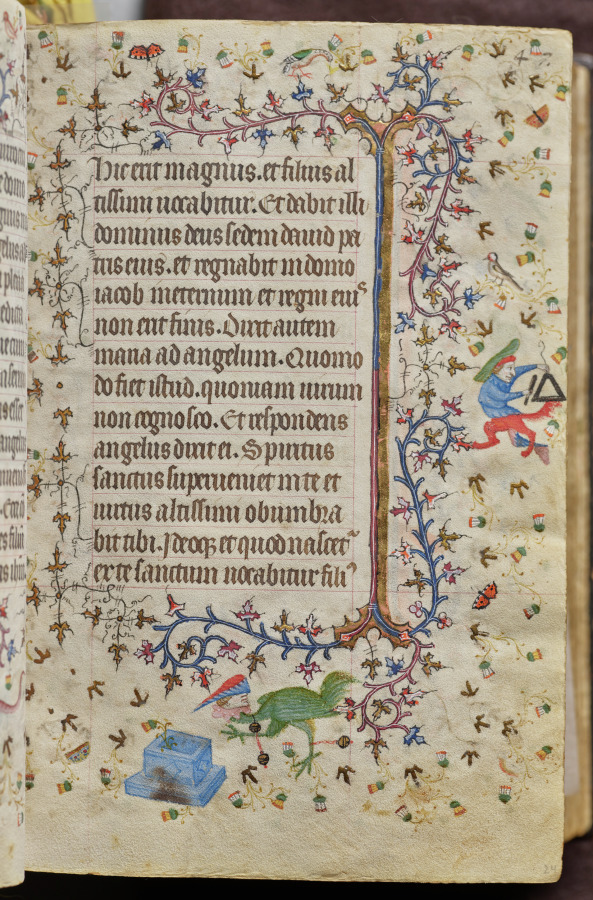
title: Hours of Charles the Noble, King of Navarre (1361-1425): fol. 24r, Text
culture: France, Paris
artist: Master of the Brussels Initials and Associates (French)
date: c. 1405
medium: ink, tempera, and gold on vellum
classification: Bound Volume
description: This precious volume was obviously highly prized by its owner, the French-born King of Navarre, who had his coat of arms painted on no less than twenty folios. Rather than directly commissioning this manuscript from a specific workshop, it seems that Charles the Noble acquired his book of hours -- perhaps ready-made for the luxury market -- while on a trip to Paris in 1404-05. A collaborative effort, six painting styles are evidenced within the pages of this codex, those of two Italians, two Frenchmen, and two Netherlanders. The painter who was responsible for the planning and decoration of the book, and who produced seventeen of the large miniatures, was a Bolognese artist known as the Master of the Brussels Initials. His principal assistant, responsible for most of the borders, was a Florentine who signed his name "Zecho" da Firenze on folio 208 verso.